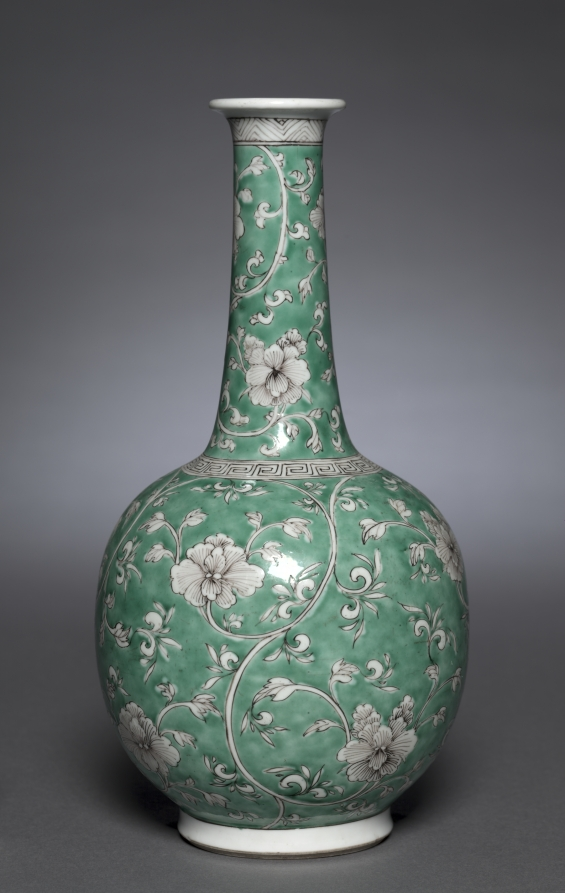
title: Bottle Vase with Floral Scrolls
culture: China, Qing dynasty (1644-1911), Kangxi reign (1661-1722)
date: 1662–1722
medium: porcelain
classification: Ceramic